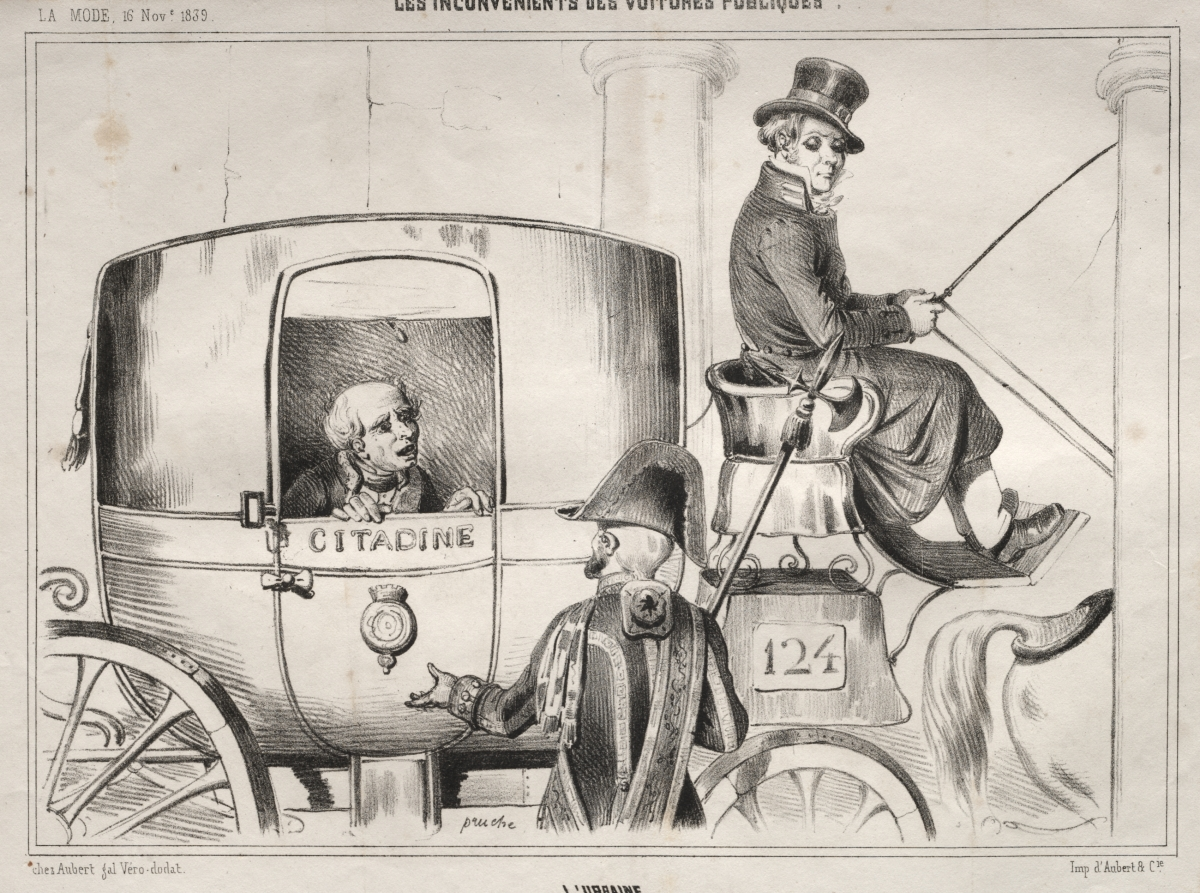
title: Actualités: Les Inconvénients des voitures publique: L'Urbaine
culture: France, 19th century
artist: Clémente Pruche (French, 1831–1870)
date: 1839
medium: lithograph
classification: Print